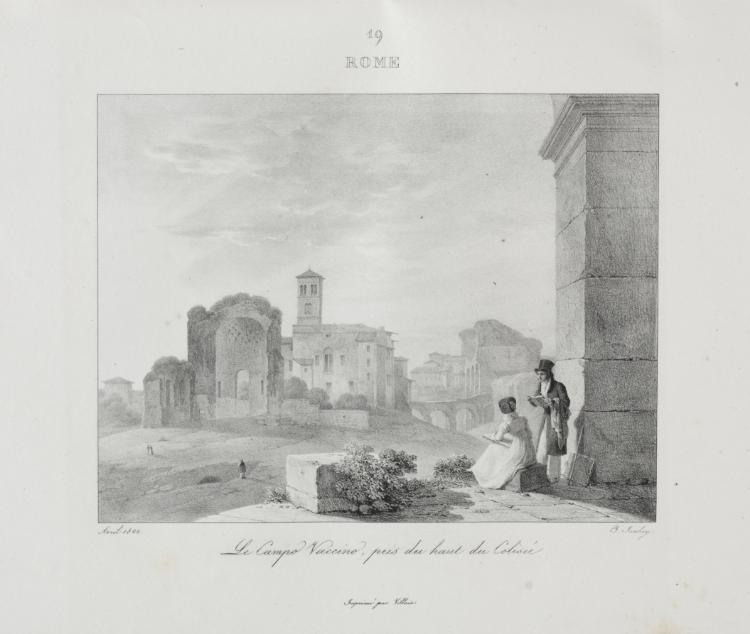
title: Voyage en Italie en 1822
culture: France, 19th century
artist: Jean-Baptiste Isabey (French, 1767–1855)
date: 1833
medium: lithograph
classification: Bound Volume